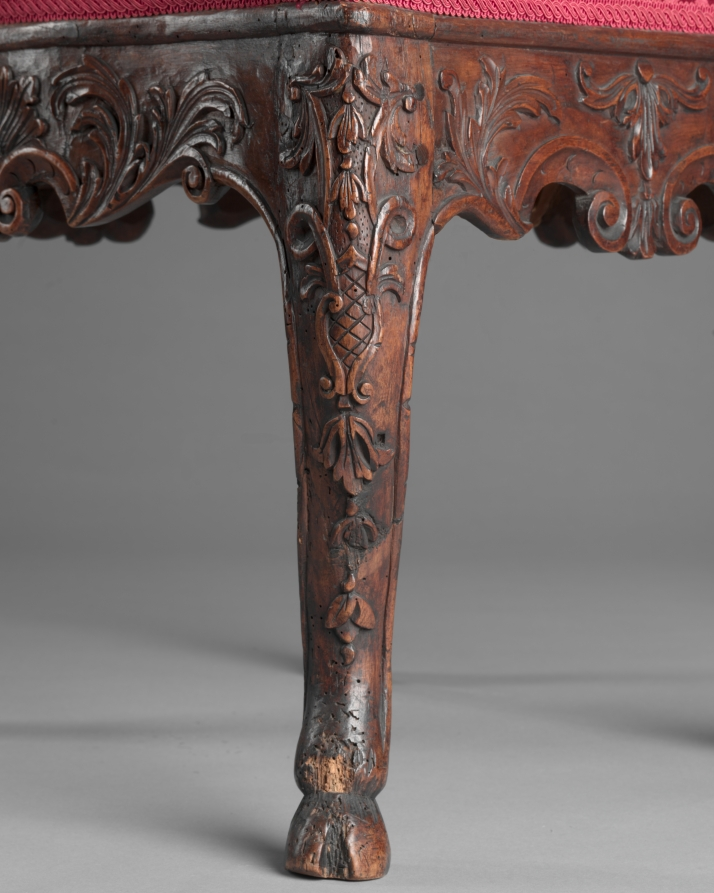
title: Side Chair (2 of 2)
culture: Germany, Belgium, or the Netherlands, early 18th century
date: early 1700s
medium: walnut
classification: Furniture and woodwork